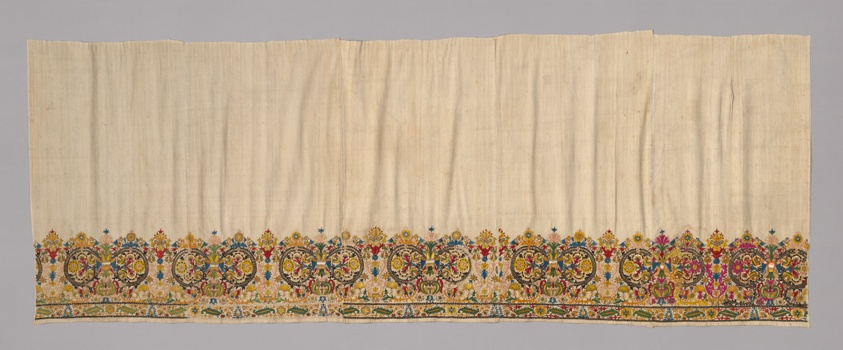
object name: Textile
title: Skirt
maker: Greece, Crete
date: 18th century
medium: Linen, plain weave; embroidered with silk in back, overcast back, chain, Cretan, Roumanian, satin, split, stem, and whipped stem stitches; couching; five loom widths joined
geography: Kríti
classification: textile; needlework (visual works)